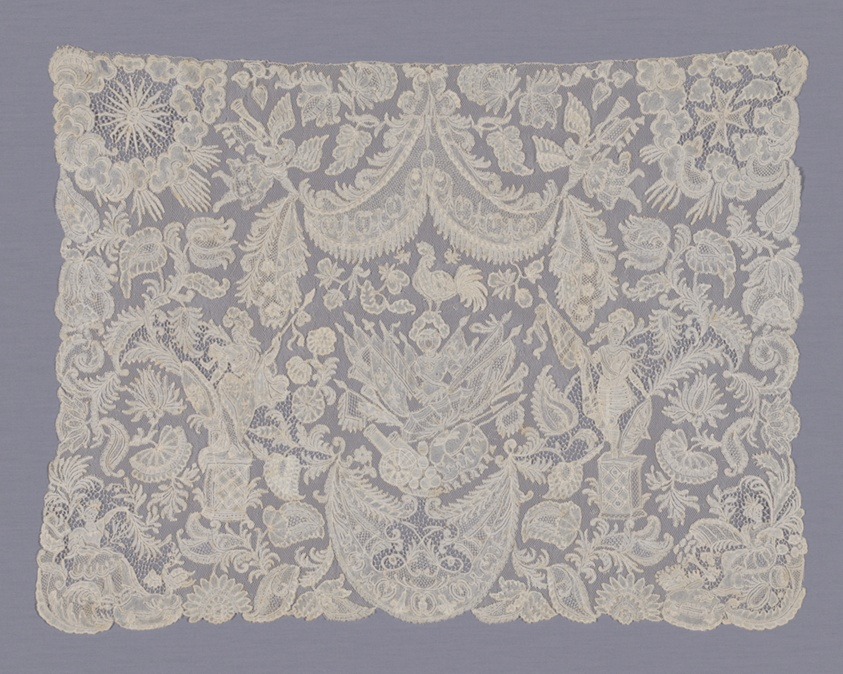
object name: Costume and Accessories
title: Cravat End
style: louis xiv, 18th Century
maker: Flanders, Brussels (present day Belgium)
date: 1700-50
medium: Linen, bobbin part-lace of a type known as "Brussels" with a Droschel mesh ground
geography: Flanders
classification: textile; lace - bobbin; lace; costume - lace; costume accessory; costume accessory worn above the waist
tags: figures (representations), fashion, animals, birds, flowers, floral motifs, plant-derived motif, suns, cannons, soldiers, fabric, sun, woman, roosters, armor, drums